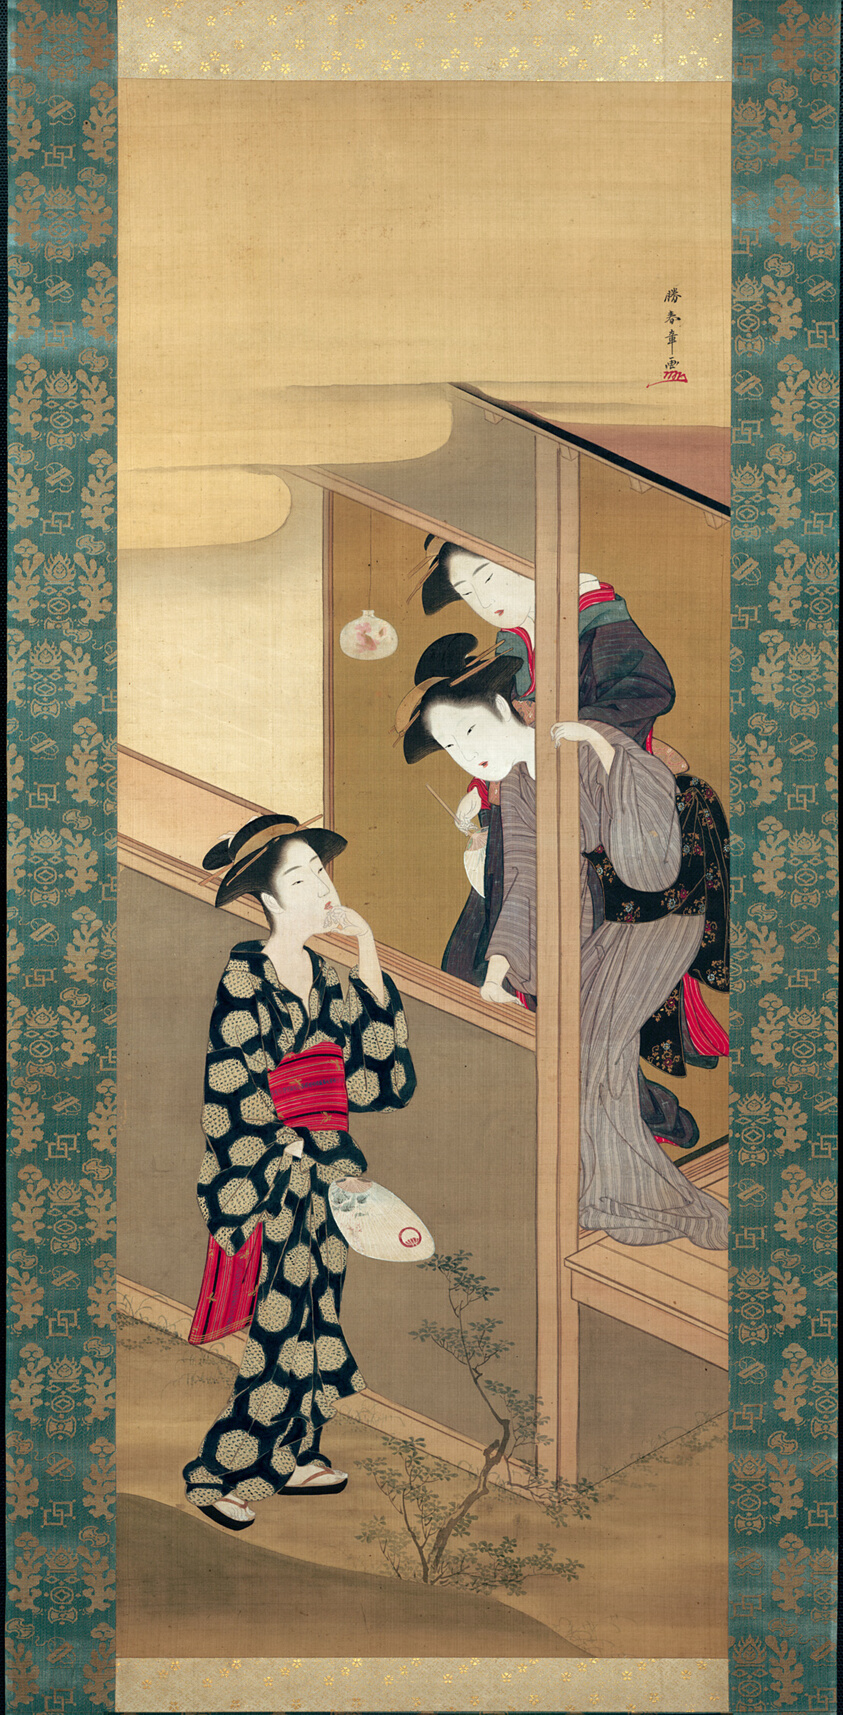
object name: Painting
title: Three Beauties Chatting by a Veranda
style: Japanese (culture or style)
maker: Katsukawa Shunsho 勝川 春章; Japanese, 1726-1792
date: About 1792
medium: Hanging scroll; ink and colors on silk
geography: Japan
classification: hanging scroll; painting; asian art